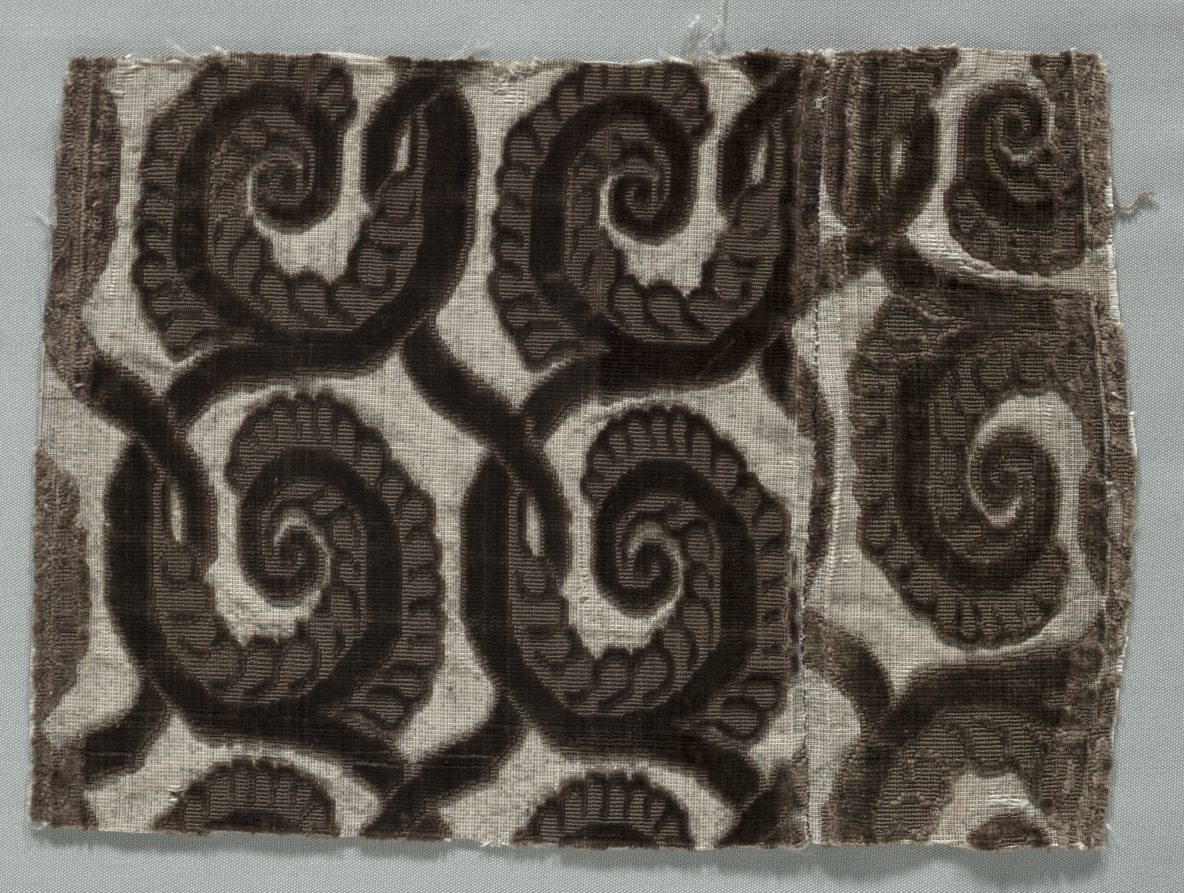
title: Velvet Fragment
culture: Italy, 17th century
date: 1600s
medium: velvet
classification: Velvet